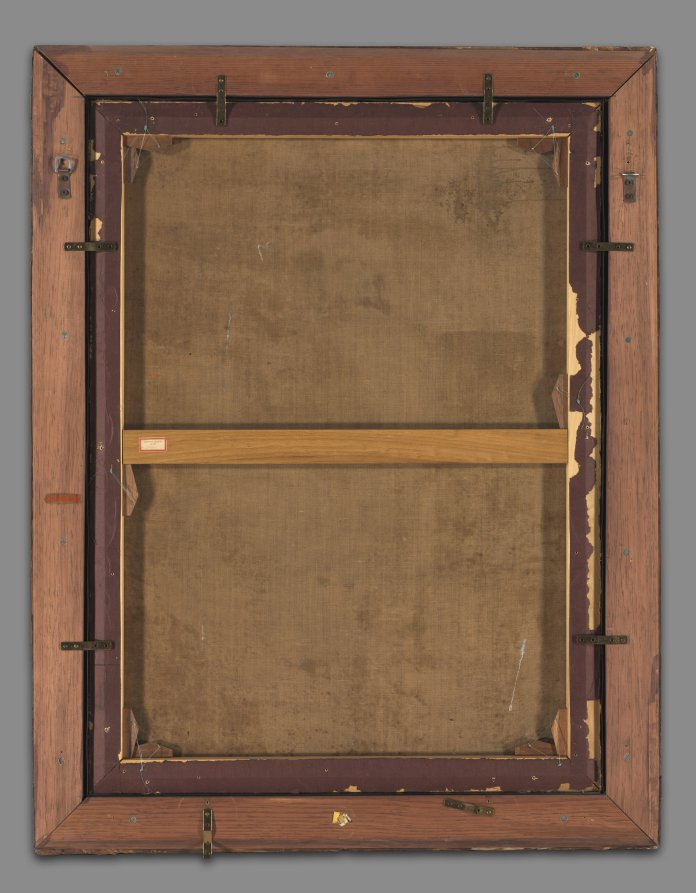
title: Saint Paul the Hermit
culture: Italy, 17th century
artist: Mattia Preti (Italian, 1613–1699)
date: c. 1662–1664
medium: oil on canvas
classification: Painting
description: After training in Rome in the 1630s and 1640s, Preti went to Naples where he continued working in a mode inspired by the work of Caravaggio. In this painting, dramatic lighting and intense naturalism depict the intersection of the heavenly and earthly realms. According to Catholic tradition, Saint Paul the Hermit fled into the desert to escape persecution from the Romans in the third century, and is revered as the first of many hermit saints. A raven brought Saint Paul a half a loaf of bread daily, which enabled him to survive to the age of 113 years. Preti depicted the saint looking heavenward in appreciation and awe of his heavenly provider.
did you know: Clothed only in a rough woven cloth, Paul's suffering drew him spiritually closer to Christ.